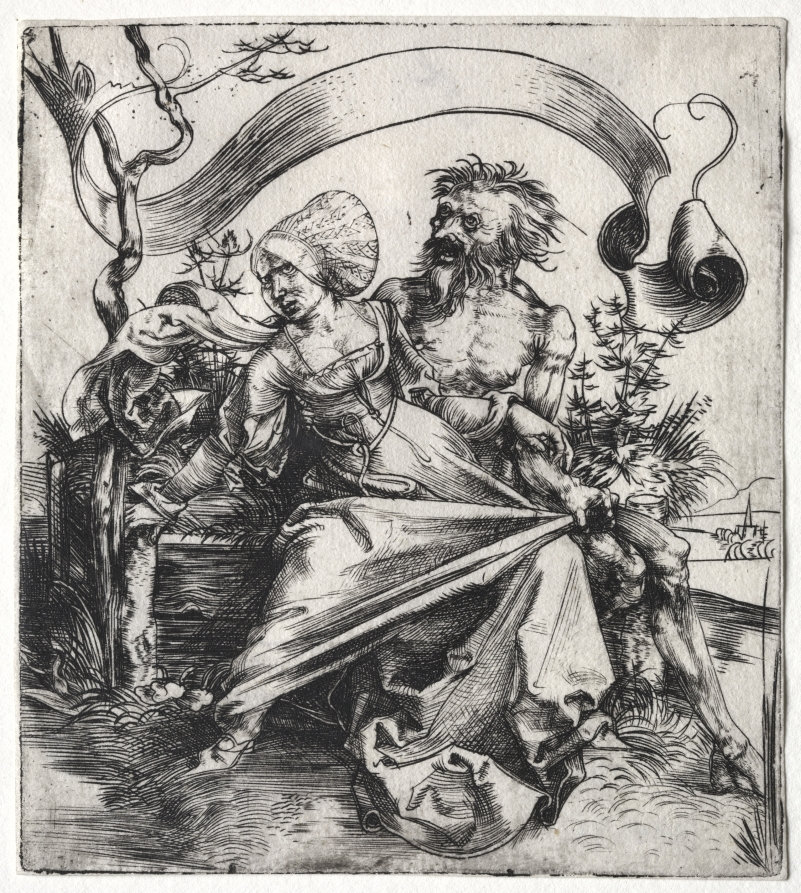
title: The Ravisher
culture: Germany, late 15th Century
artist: Albrecht Dürer (German, 1471–1528)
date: c. 1495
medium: engraving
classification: Print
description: The Ravisher portrays a chaotic struggle between a woman and Death, personified here as a wild-eyed corpse-like man. Having mistaken Death as her lover, she attempts to flee, but is thwarted by his firm grip. Images that feature Death often communicated moralizing messages about the dangers of sin and the fleeting nature of life. Had Dürer thought it necessary, he would have included an inscription in the scroll above. However, this could have been redundant since the horror of the scene clearly indicates that Death was exacting payment for the woman’s life of sin.